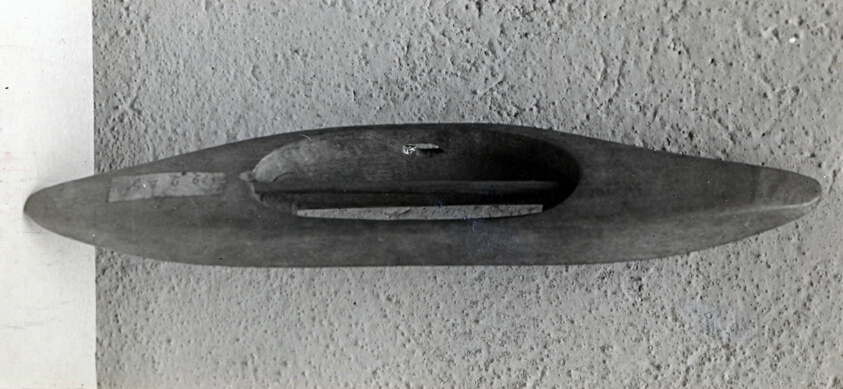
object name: Textile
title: Shuttle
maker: Europe or United States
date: 17th/18th century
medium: Wood weaving tool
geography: Europe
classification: textile; weaving; textile working equipment; accessories (object genre)